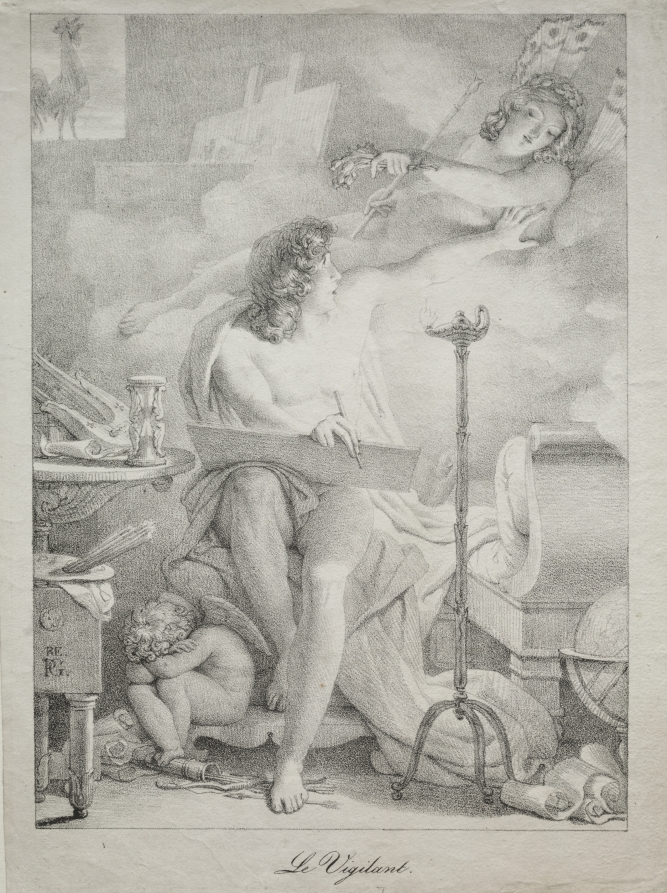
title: The Vigil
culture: France, 19th century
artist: Pierre Guérin (French, 1774–1833)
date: 1816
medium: lithograph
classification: Print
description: Guérin found the lithographic crayon to be perfect for rendering the clarity of sculptural form. He used a combination of subtle hatching, smooth contour lines, and shading to represent a young Greek artist surprised by an inspirational visit from a winged female as he works late into the night.